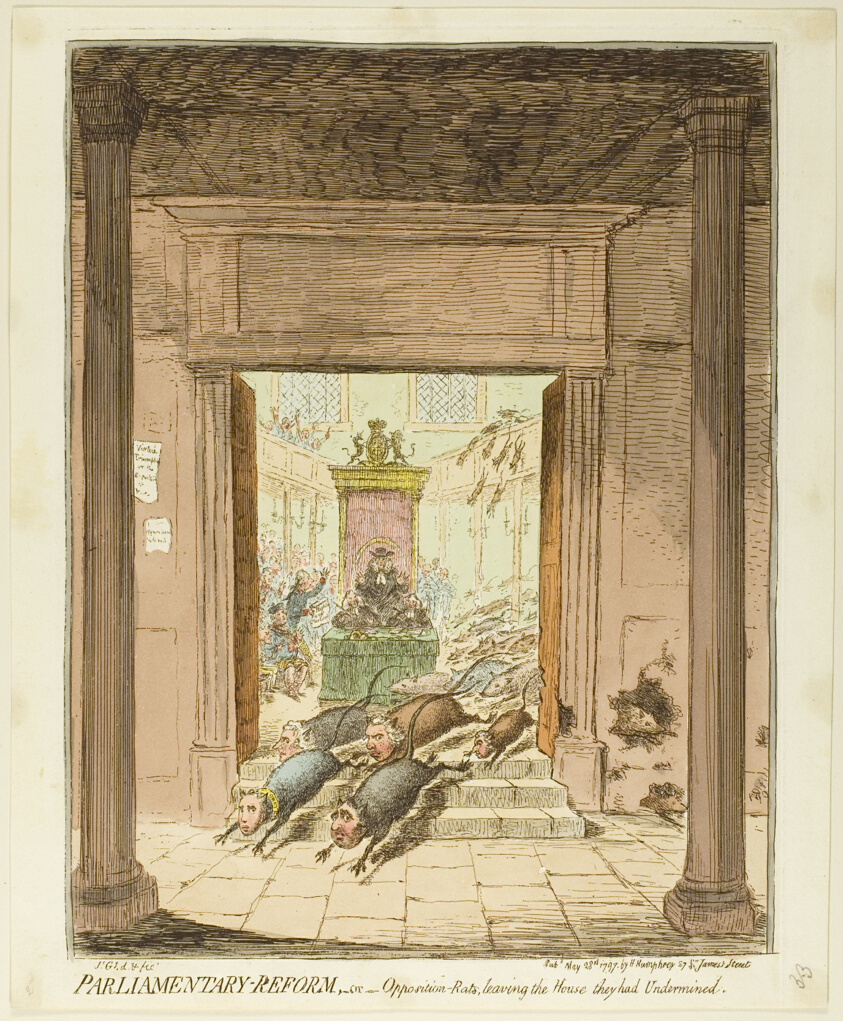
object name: Print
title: Parliamentary Reform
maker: James Gillray (English, 1756-1815); published by Hannah Humphrey (English, c. 1745-1818)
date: published May 28, 1797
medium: Hand-colored etching on paper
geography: England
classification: etching; print; prints and drawing